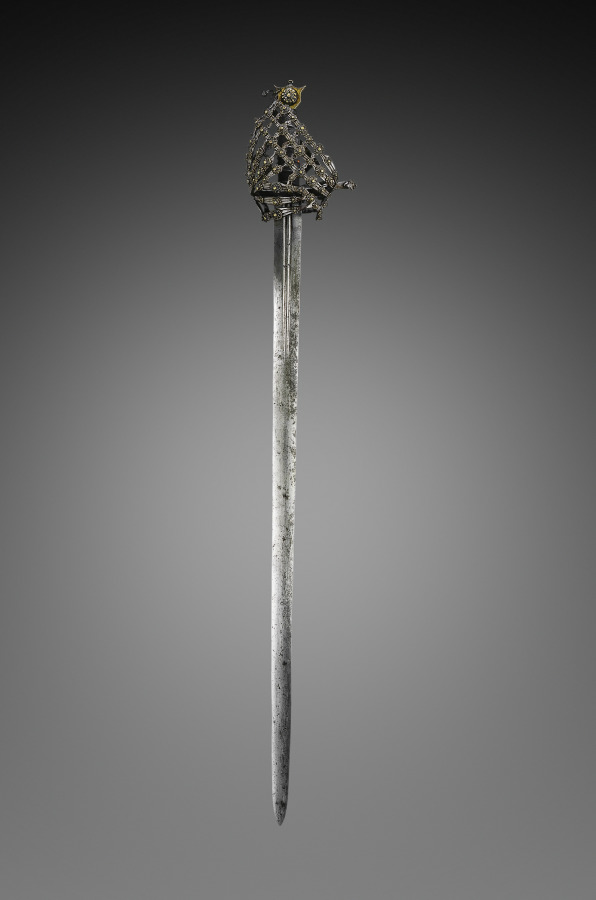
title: Schiavona Broadsword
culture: Italy, Venice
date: 1700s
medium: steel, brass, leather and wood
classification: Arms and Armor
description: This broadsword or basket-hilted sword is a type that was often carried by the bodyguards of the Doge of Venice who came from the Dalmatian Coast of present-day Croatia and were then called Schavoni in Venice. The complex barred guard slopes forward and protects the hand.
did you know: This sword has what is known as a "cat's head" pommel, a spherical knob that serves as a counterweight at the opposite end of the sword from the point.